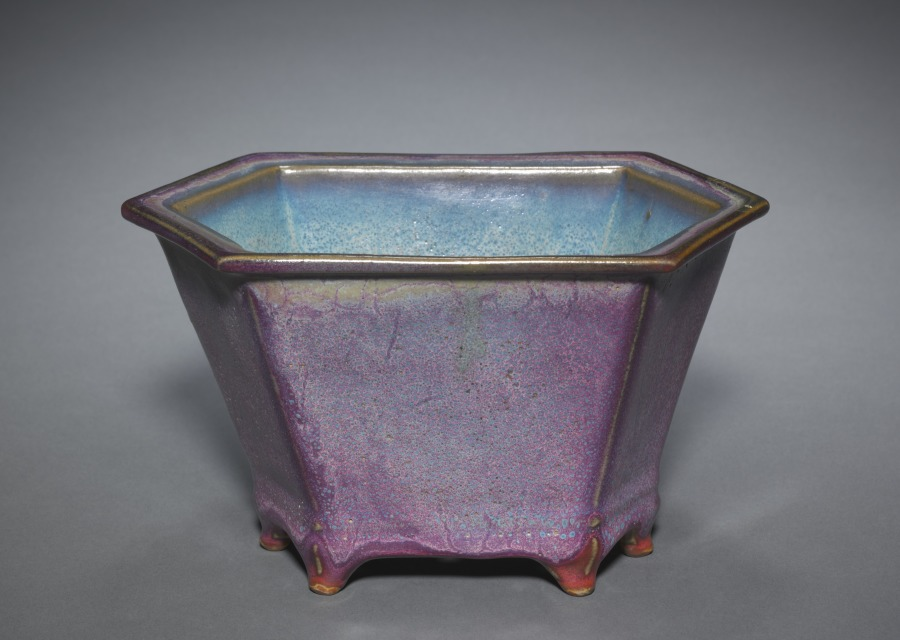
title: Pair of Hexagonal Flower Pots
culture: China, Henan province, Yuxian, Juntai, Ming dynasty (1368-1644)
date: 1300s–1400s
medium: porcelaneous stoneware, numbered Jun ware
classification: Ceramic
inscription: 八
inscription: 明窓用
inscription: 養心殿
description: This deep hexagonal flowerpot, one of a pair in the collection, is numbered "8" and bears additional inscriptions to indicate specifically the location of its usage within the palace: "for use in the Study of Illumination (Mingchuang yong)" within the "Hall of Cultivating the Mind (Yangxin Dian)" of the Forbidden City. The inscriptions seem to suggest the Qing imperial provenance of this pair.